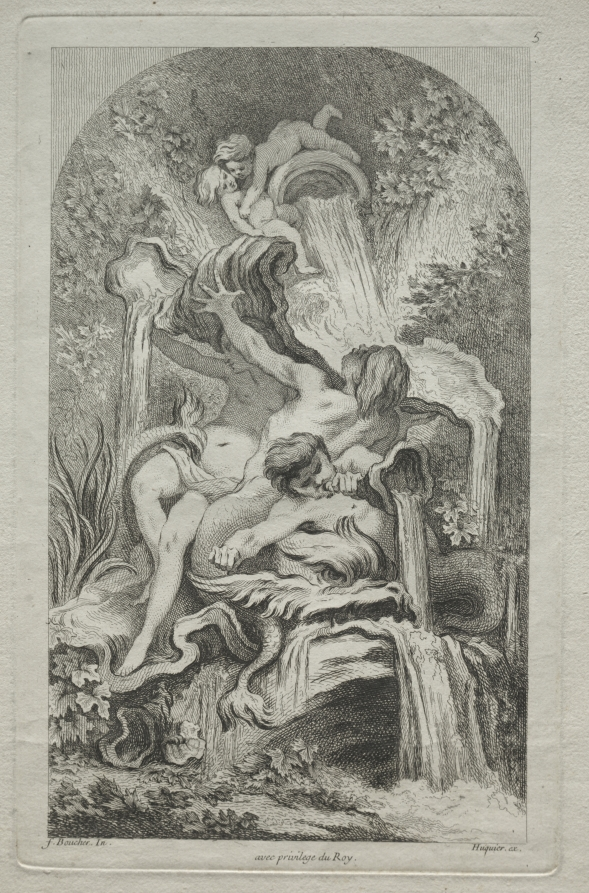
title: Book of Fountains: No. 5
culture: France, 18th century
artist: Gabriel Huquier (French, 1695–1772)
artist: after François Boucher (French, 1703–1770)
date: c. 1736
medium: etching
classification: Print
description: Boucher was one of the most prolific designers of ornament prints. With their aquatic motifs and gracefully curving and scalloped forms, these designs for fantastic, even bizarre fountains perfectly illustrate the whimsical Rococo approach. Derived from the French word for shell, rocaille, the Rococo was a light, playful style filled with shell motifs (which stemmed in part from a vogue for collecting shells), naturalistic curves, scrolls, and plant forms.